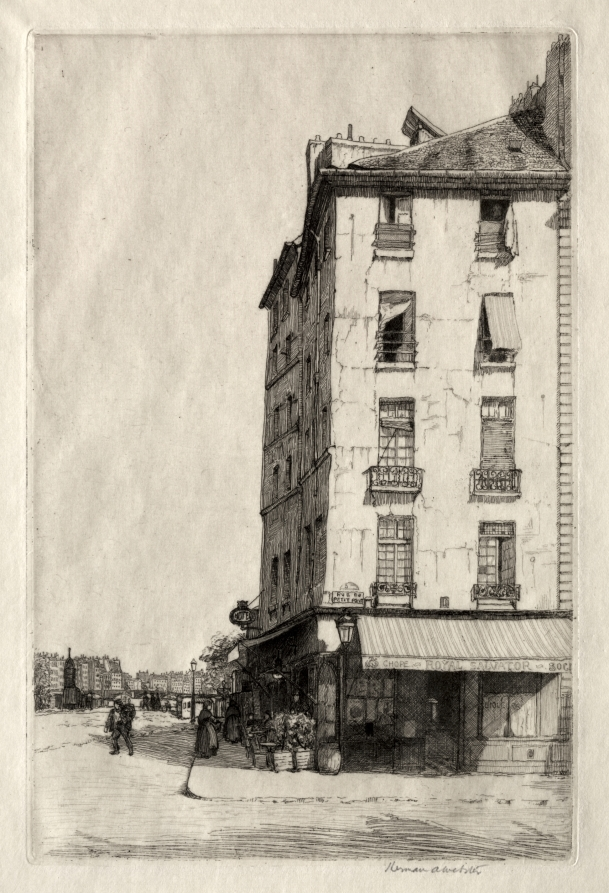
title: Quay Montebello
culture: America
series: 28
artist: Herman Armour Webster (American, 1878–1970)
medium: etching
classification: Print